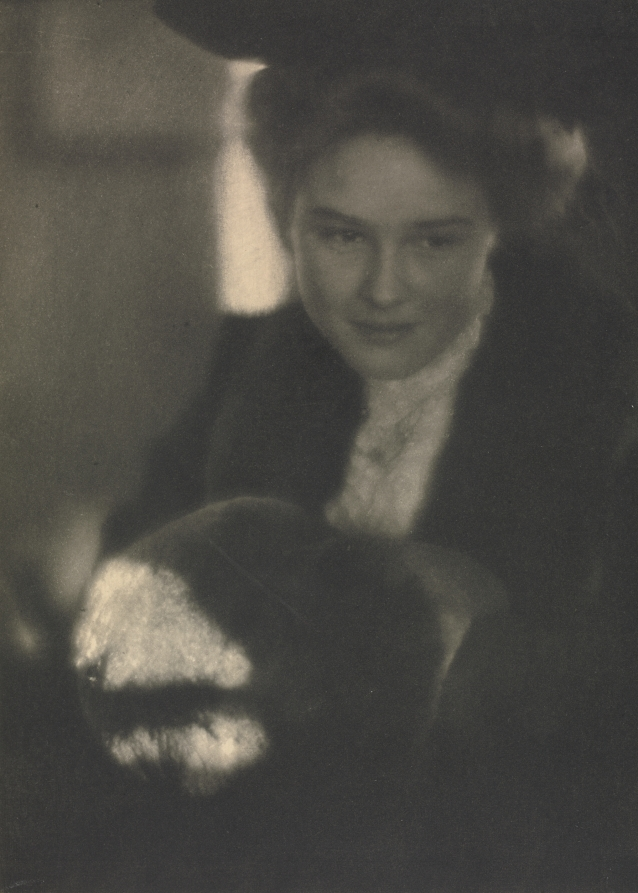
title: Camera Work: Portrait - Miss Mary Everett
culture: America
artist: Clarence H. White (American, 1871–1925)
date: 1908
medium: photogravure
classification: Bound Volume